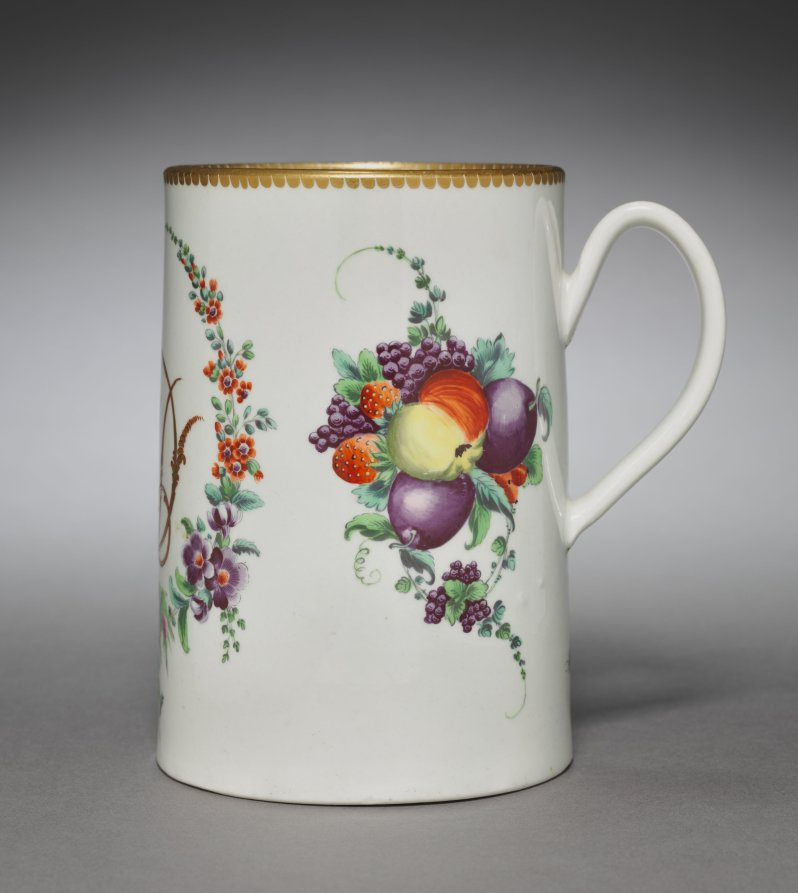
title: Cann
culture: England, 18th century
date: c. 1770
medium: ceramic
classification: Ceramic